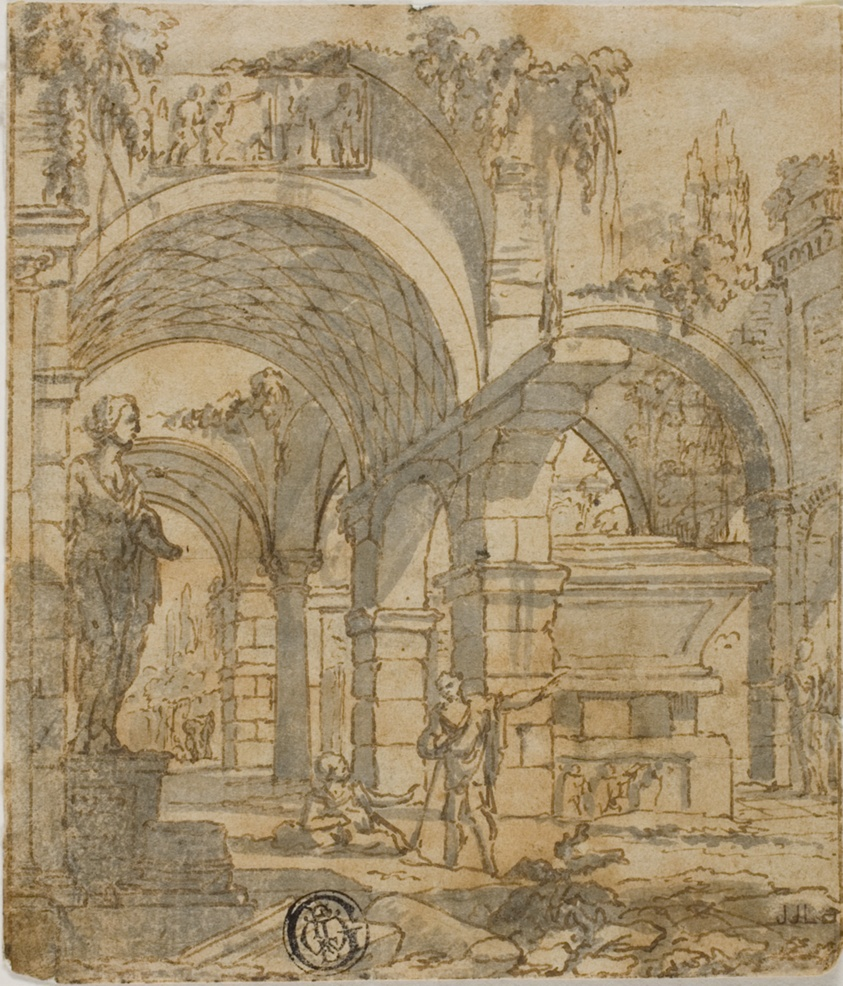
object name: Drawing and Watercolor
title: Roman Ruins and Two Figures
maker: Attributed to Giovanni Paolo Pannini (Italian, 1691-1765); or Giovanni Ghisolfi (Italian, 1623-1683)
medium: Pen and brown ink, with brush and gray wash, on tan laid paper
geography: Italy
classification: pen and ink drawings; drawings (visual works); prints and drawing